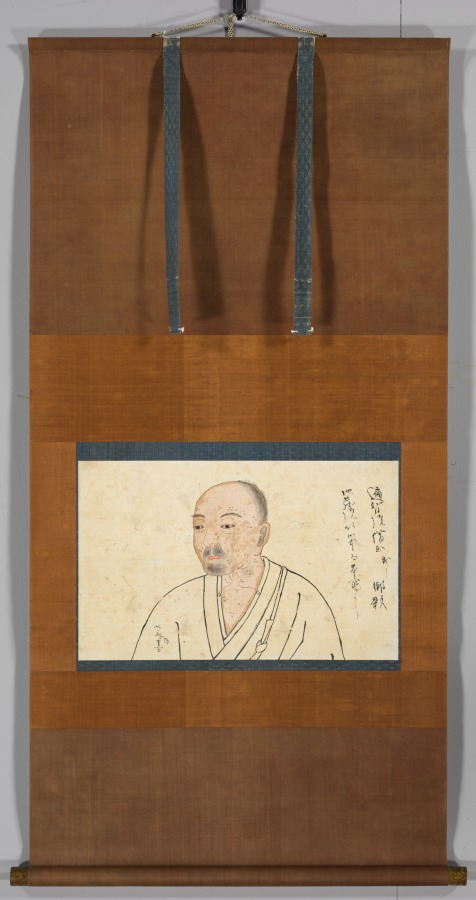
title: Portrait Study of Seigen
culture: Japan, Kamakura period (1185–1333)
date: 1300s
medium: hanging scroll; ink and slight color on paper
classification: Painting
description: This is a portrait study of the monk Seigen (1162–1231). The inscription identifies him and notes that the study is after a portrait in the subtemple Jizō’in at Daigoji. The artist included scars from an illness, and made notations about the colors the clothing should be. Seigen was abbot of Daigoji, one of the most influential Esoteric Buddhist temples in Japanese history.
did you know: The blotches on the monk's face may have been caused by smallpox.